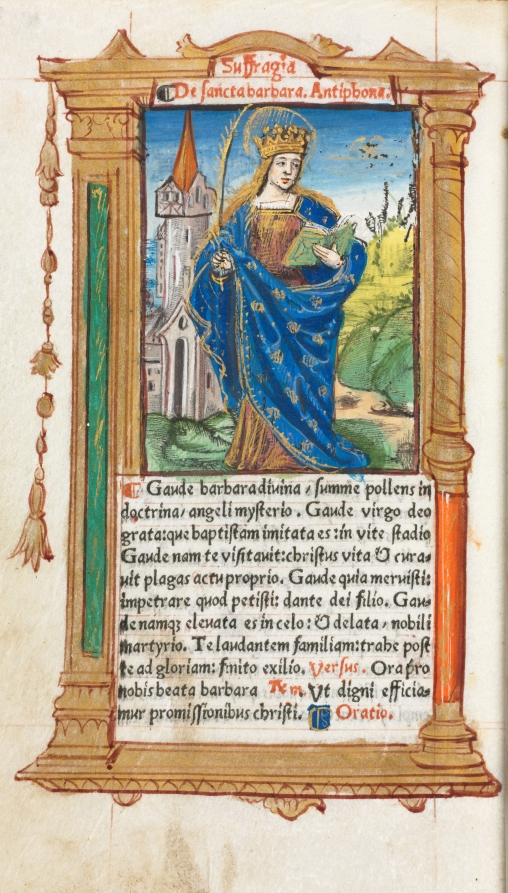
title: Printed Book of Hours (Use of Rome): fol. 110v, St. Barbara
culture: France, Paris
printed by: Guillaume Le Rouge (French, Paris, active 1493–1517)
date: 1510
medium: 112 Printed folios on parchment, bound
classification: Bound Volume